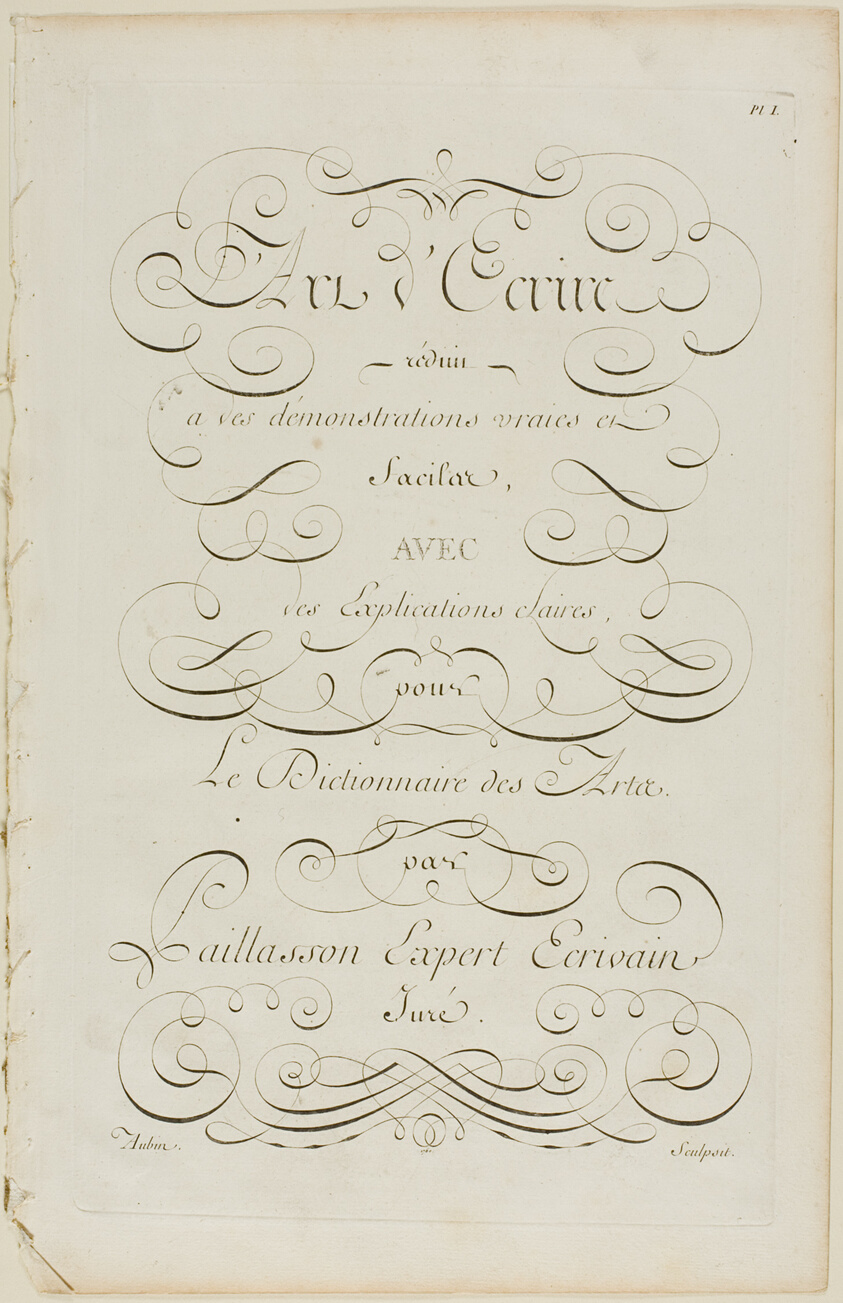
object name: Print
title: Art of Writing, from Encyclopédie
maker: Aubin (French, active 18th century); after Charles Paillasson (French, 1718-1789); published by André le Breton (French, 1708-1779), Michel-Antoine David (French, c. 1707-1769), Laurent Durand (French, 1712-1763), and Antoine-Claude Briasson (French, 1700-1775)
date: 1760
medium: Engraving on cream laid paper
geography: France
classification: engraving; print; prints and drawing